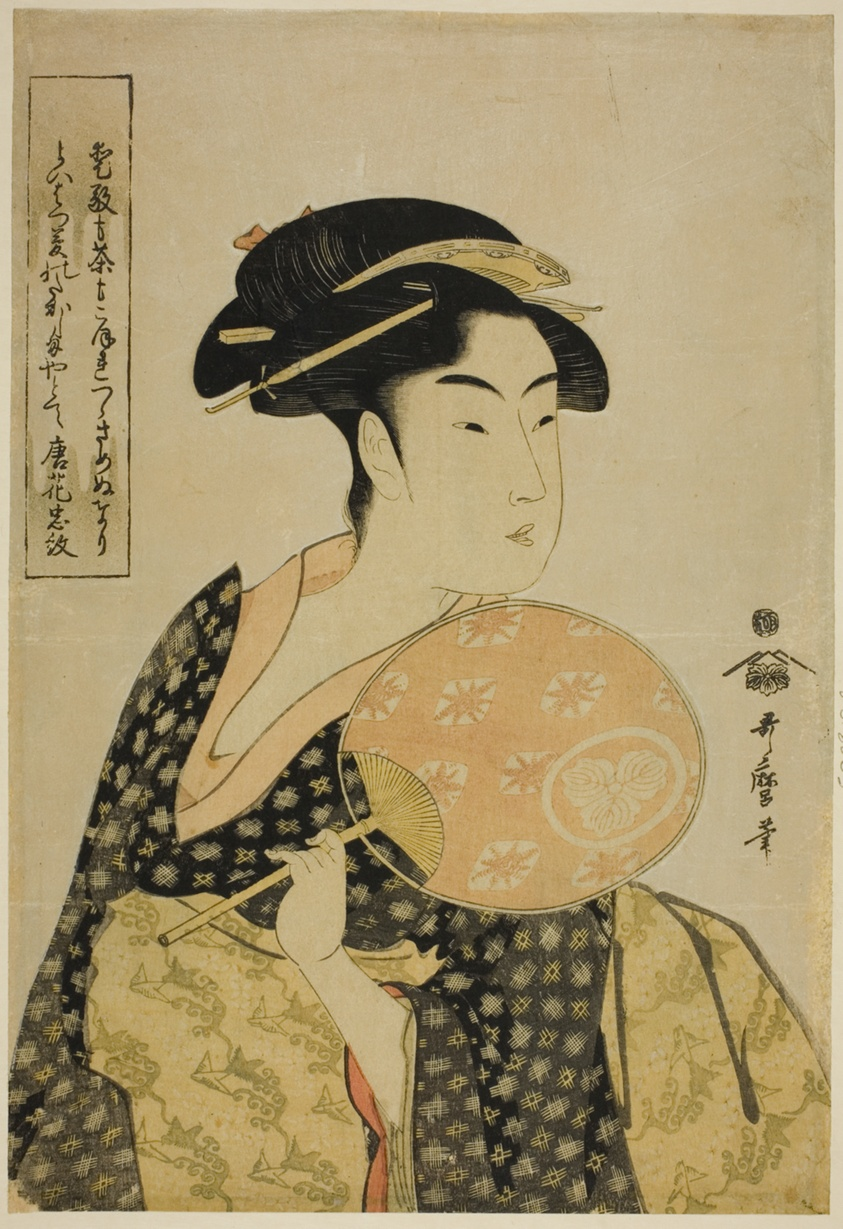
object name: Print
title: Takashima Ohisa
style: Japanese (culture or style)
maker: Kitagawa Utamaro 喜多川 歌麿; Japanese, 1753 (?)-1806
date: c. 1793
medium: Color woodblock print; oban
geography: Japan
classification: woodblock print; print; asian art